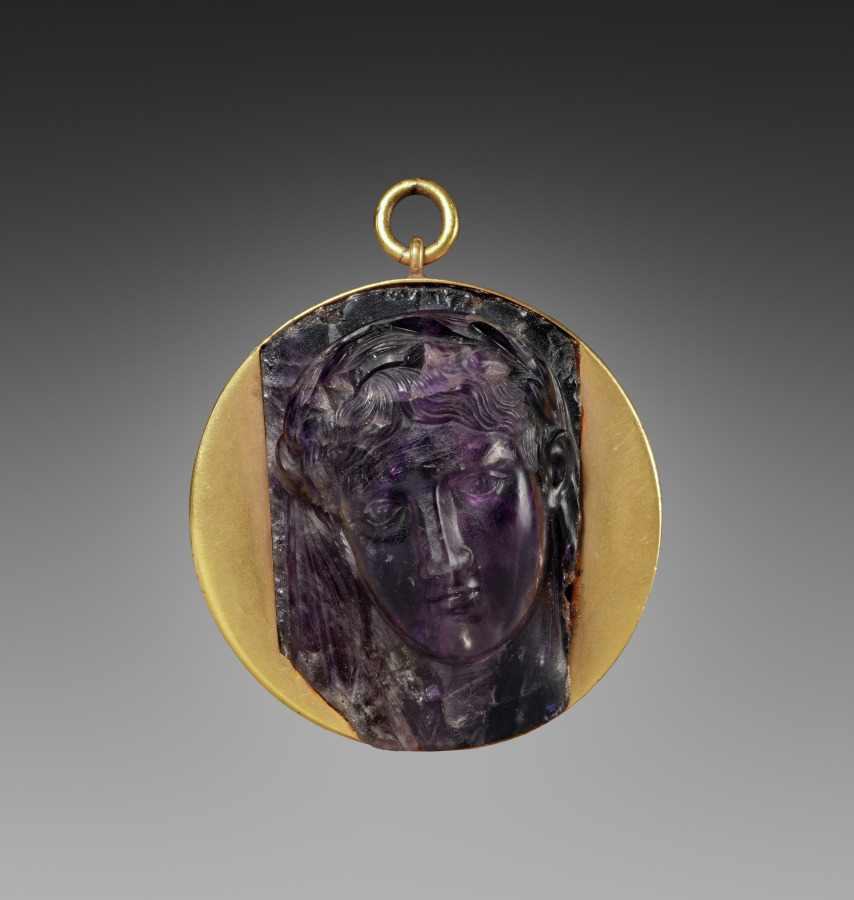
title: Cameo: Head of a Woman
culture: Italy, Roman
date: 1–100 CE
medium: amethyst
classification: Jewelry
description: This carved amethyst cameo depicts a woman wearing a laurel wreath and a palla, a cloak worn by Roman noblewomen. The palla is tucked behind the woman’s ears and is visible over her right shoulder. She may have been a member of the Julio-Claudian imperial family or a wealthy private individual. In her hairstyle, straight nose, and small but full mouth the woman closely resembles portrait cameos identified as Antonia Minor, niece of the emperor Augustus and mother of the emperor Claudius. Only elite Romans could use amethyst; true purple stones had to be imported to Rome at great expense.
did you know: The metal setting is modern; this gem was likely originally a roundel.